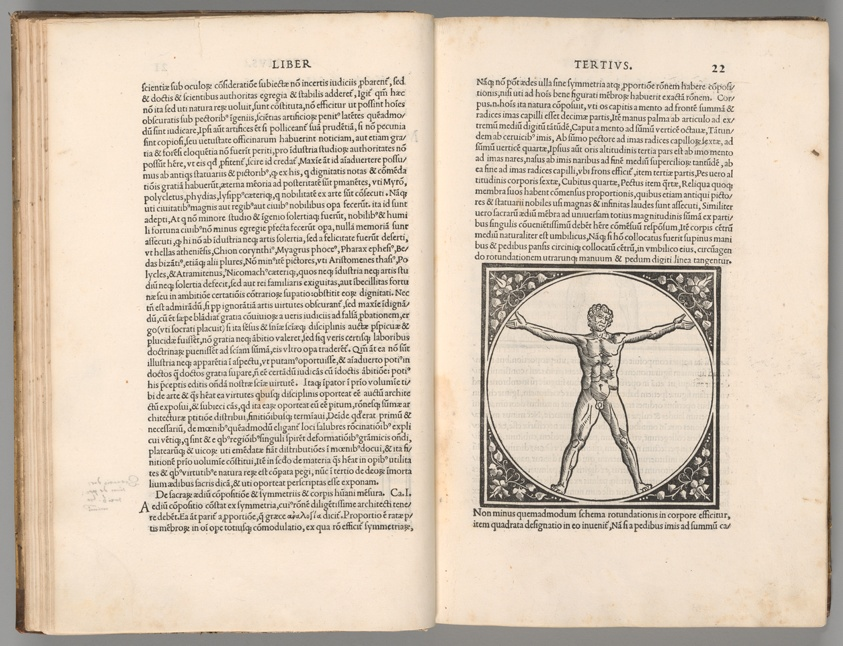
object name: Book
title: De Architectura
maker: Marcus Vitruvius Pollio (Roman, active first century BCE)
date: Venice, Italy: Ioannis de Tridino, also known as Tacuino, 1511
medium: Letterpress and woodcut in black on ivory laid paper; four-piece decorative woodcut title border with scrolling foliage and dolphin motifs; full alum-tawed ornamental leather binding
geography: Italy